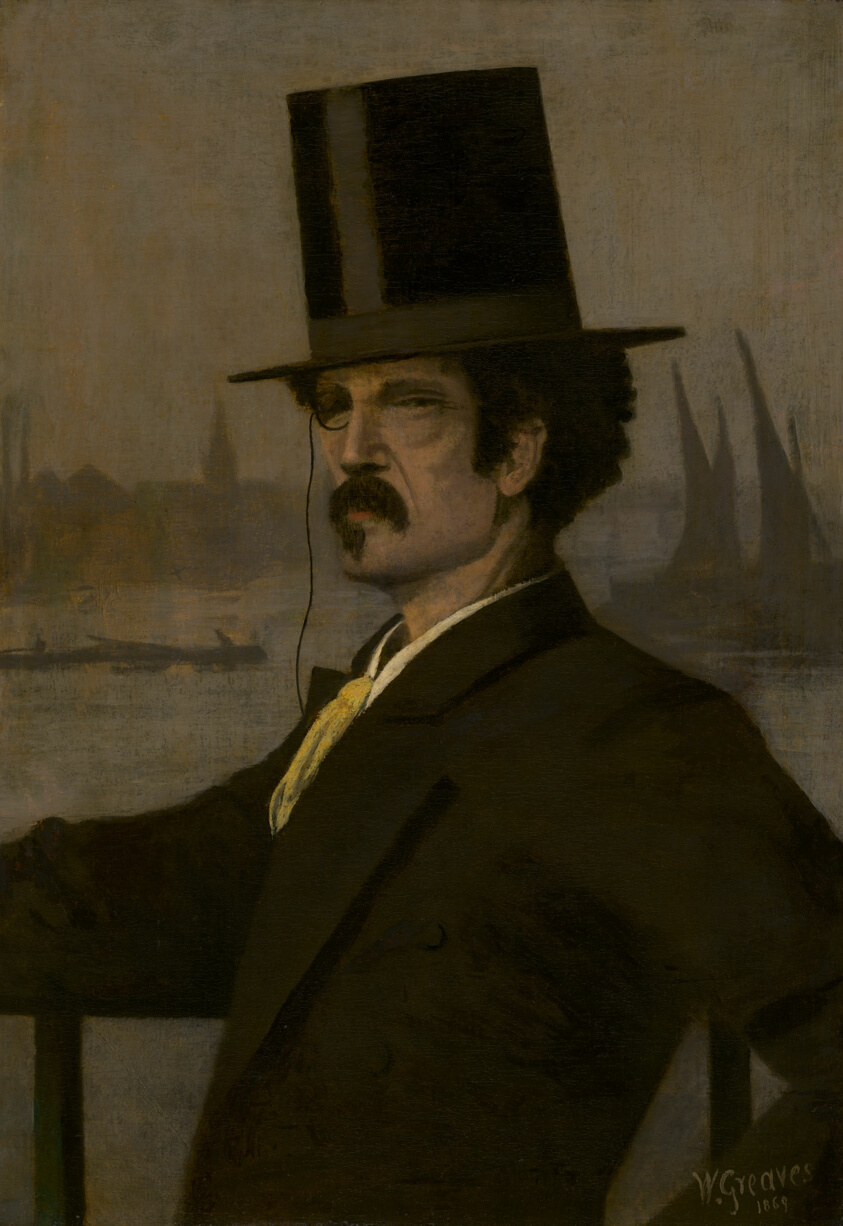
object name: Painting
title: James McNeill Whistler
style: nineteenth century, 19th century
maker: Walter Greaves (English, 1841–1930)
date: 1869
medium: Oil on canvas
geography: England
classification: oil on canvas; portrait; paint; oil paintings (visual works); british; painting; european painting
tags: portraits: male subject, portraits, portrait, water, ships, boats, hat, chair, artist, Century of Progress, world's fairs, Chicago World's Fairs